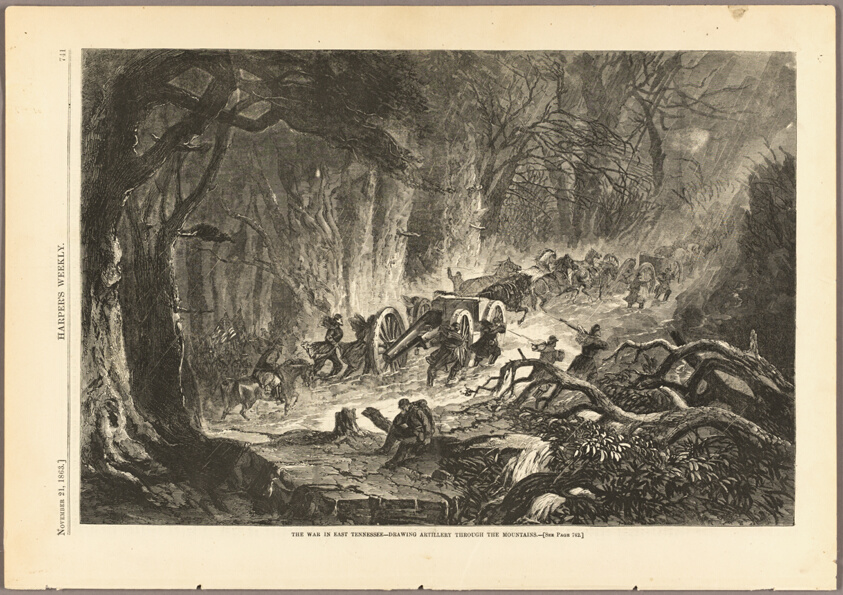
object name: Print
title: The War in East Tennessee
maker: Unknown artist (American, 19th century)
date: published November 21, 1863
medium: Wood engravings in black on cream wove paper (newspaper), folded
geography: United States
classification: wood engraving; print; prints and drawing